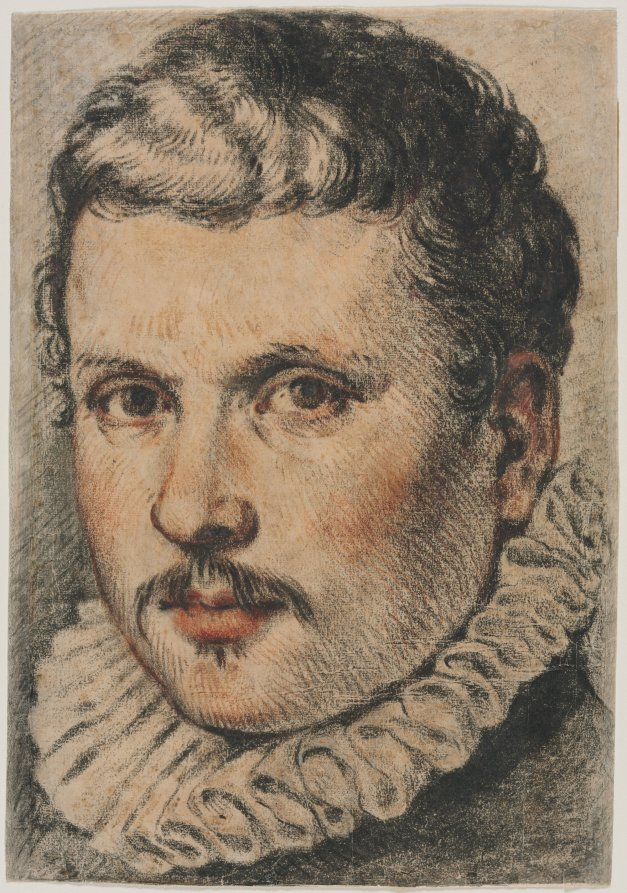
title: Portrait of a Man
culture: Italy, 16th century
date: 1500s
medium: black and red chalk, with brown and purple chalk, heightened with white gouache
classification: Drawing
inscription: VERSO (on separately mounted perimeter strip), lower center, in graphite: Daniel Du Moustier : 1574-1646 / French Crayon [underlined] and Pastel artist. Worked for Francis I / and Henry IV. Drew Portraits of all the distinguished men of the Time.